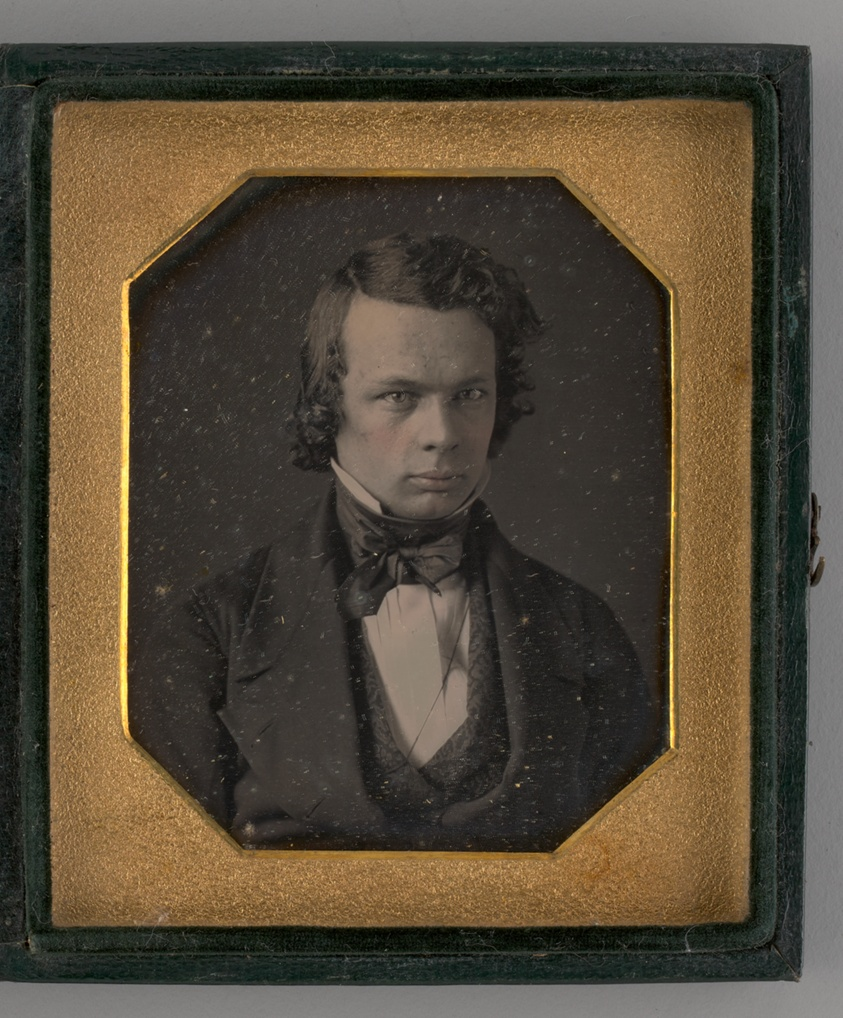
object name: Photograph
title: Untitled (Portrait of a Man)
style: 19th century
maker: Unknown maker; American, 19th century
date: 1846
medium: Daguerreotype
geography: United States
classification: portrait; photograph; photographic process; photography; portrait; daguerreotype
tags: lundberg collection, portraits, portraits: male subject, people, men, portrait, Male